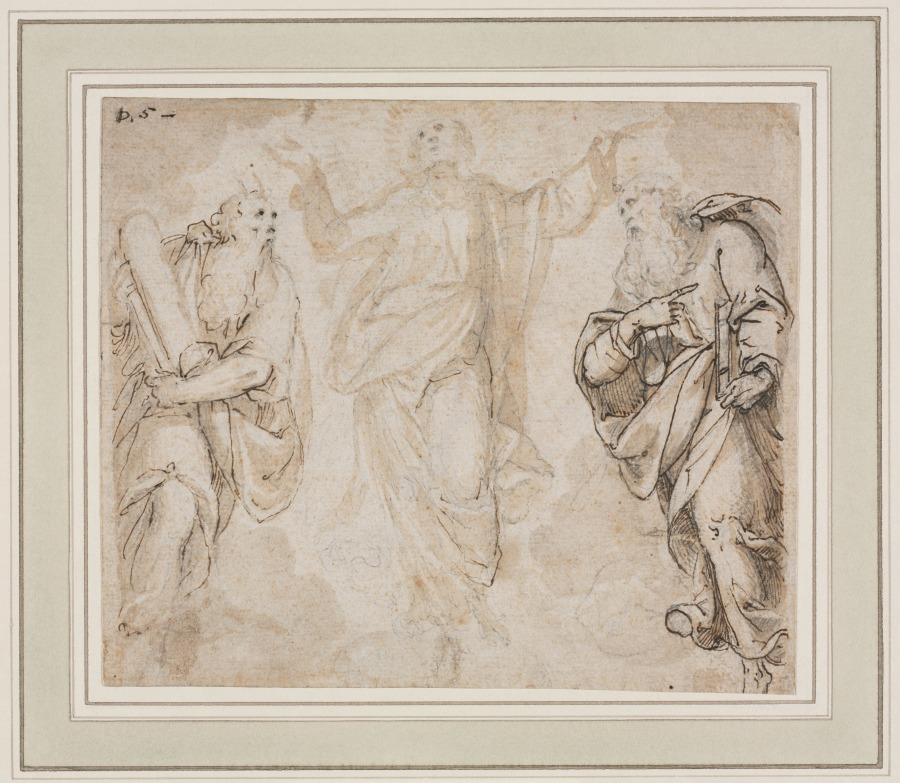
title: The Transfiguration (recto); Study of Hands (verso)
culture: Italy, 16th century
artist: Camillo Procaccini (Italian, 1546–1629)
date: c. 1590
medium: pen and brown ink and graphite and brush and brown wash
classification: Drawing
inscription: recto: upper left, in brown ink: D. 5 - verso: upper center, in brown ink: [illegible, cropped] / 2 ; upper left, in graphite: by Pr[illegible]Ni ; upper left, in pink pencil: .2 ; lower right, in graphite: [STAT?] ; SECONDARY SUPPORT, lower right, in graphite: 00265[2?] [cropped]